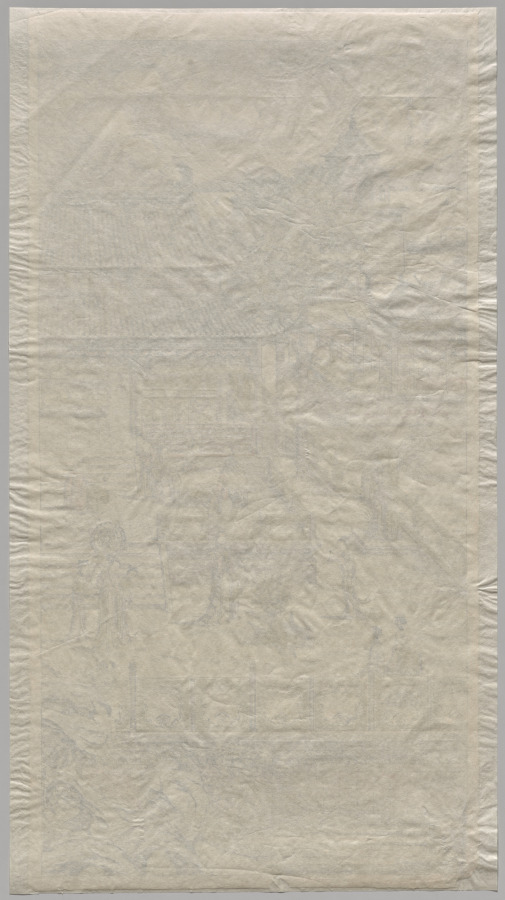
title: Music in the Jade Palace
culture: China, Qing dynasty (1644–1911), Qianlong reign (1736–95)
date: 1736–95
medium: Polychrome woodblock print; ink and color on paper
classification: Print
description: In the 1600s, printing flourished in such Jiangnan cities as Nanjing, Suzhou, Hangzhou, and Huizhou, evolving from privately enjoyed illustrated books printed in color to more commercialized single-sheet color prints that were hung on walls and became part of the rich urban visual culture.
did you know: Woodblock printing in color reached a height in China in the 1600s to 1700s. The prints were executed by means of sets of separate blocks, each carved to print a different color.